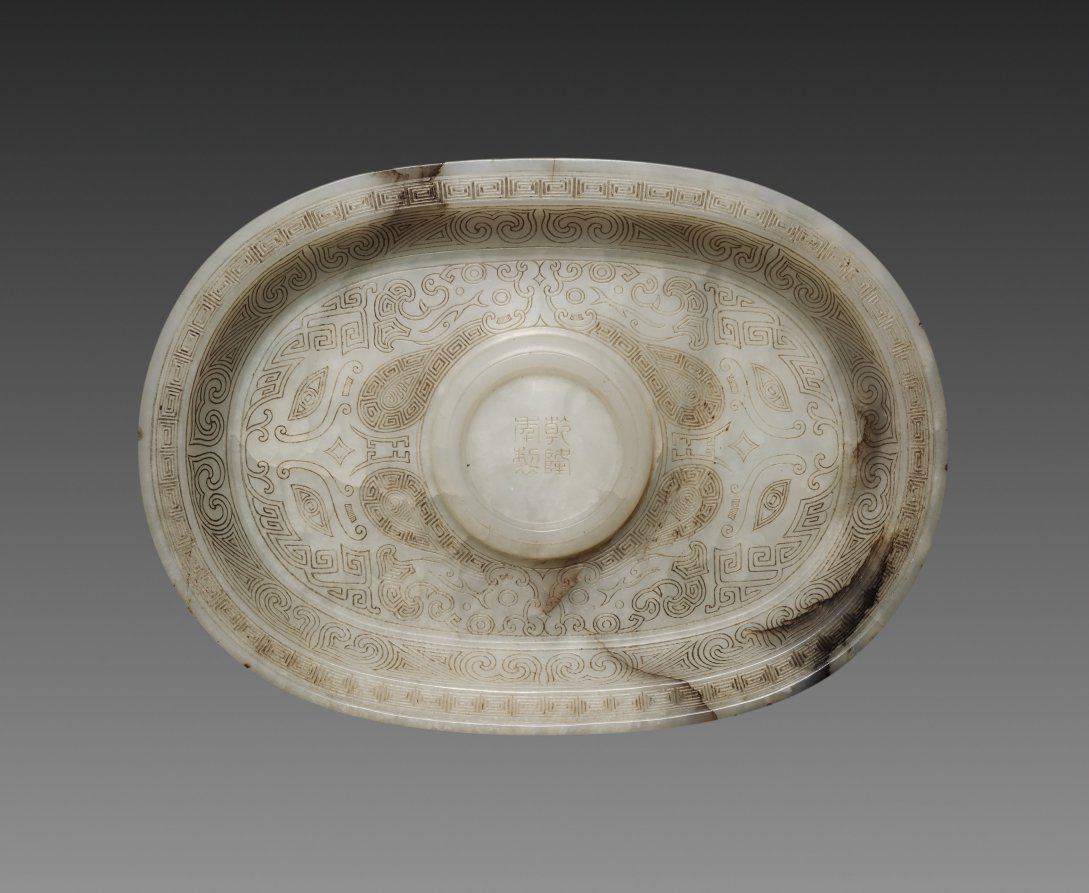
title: Oval Cup Stand with Animal Masks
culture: China, Qing dynasty, Qianlong mark and period (1736–95)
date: 1736–95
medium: white jade with black markings and incised decoration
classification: Jade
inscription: 乾隆年制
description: This tablet is engraved with minuscule characters; the inscribed text is an essay by the Qianlong emperor. The supreme jade quality and similar carving style (for example, the sharp inverted edges) suggest that this jade scepter could have been made during the 1700s with the artistic intent to "model after the past."